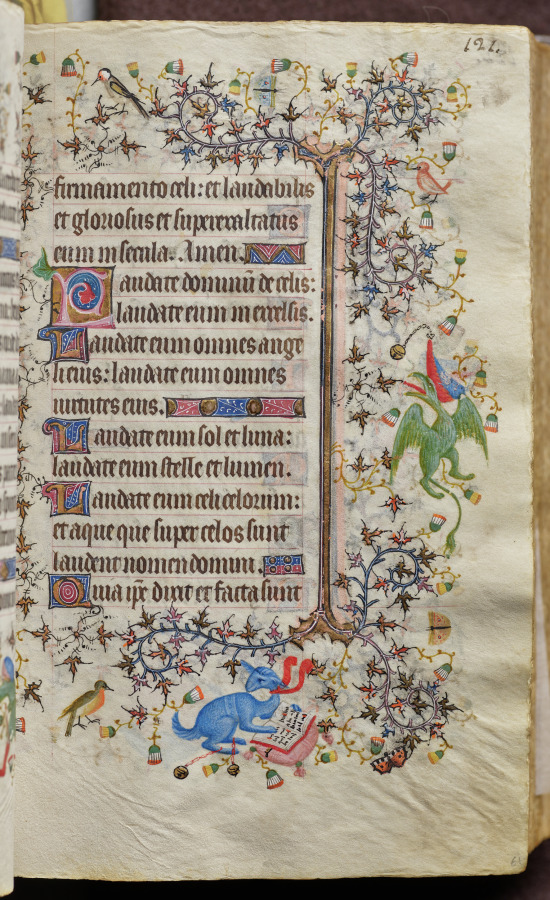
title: Hours of Charles the Noble, King of Navarre (1361-1425): fol. 61r, Text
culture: France, Paris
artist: Master of the Brussels Initials and Associates (French)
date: c. 1405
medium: ink, tempera, and gold on vellum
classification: Bound Volume